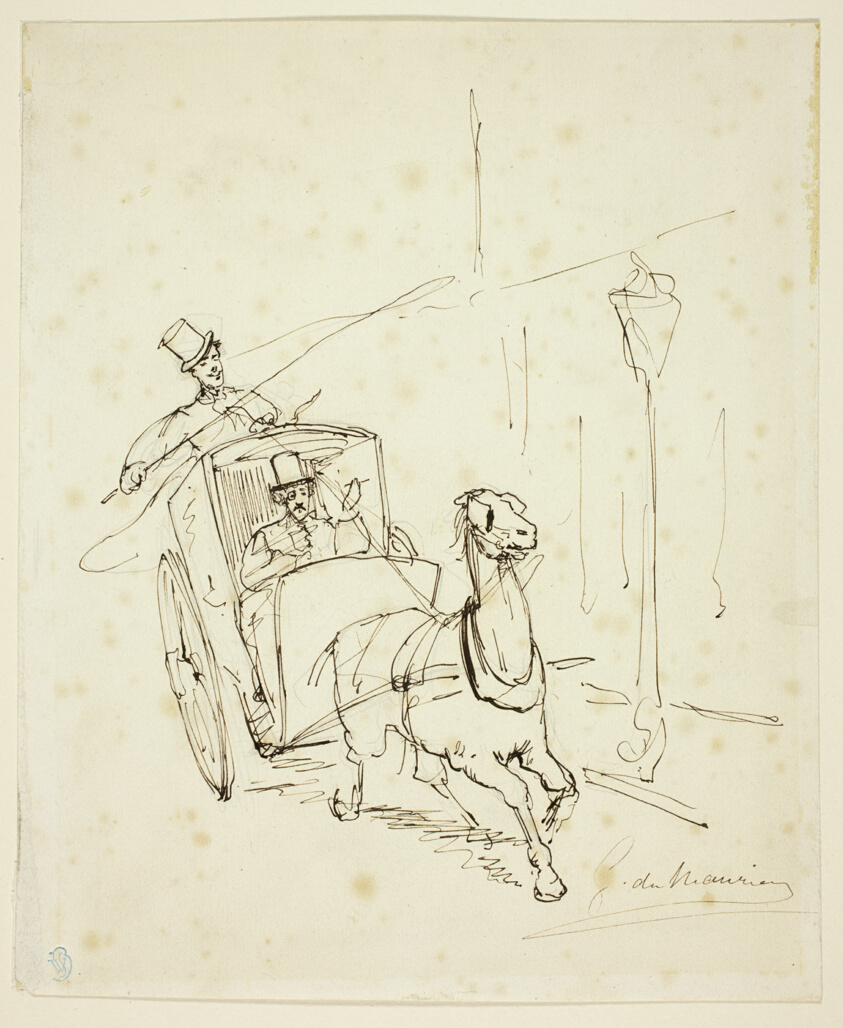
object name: Drawing and Watercolor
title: Whistler in a Hansom Cab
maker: George Louis Pamella Busson Dumaurier; French, 1834-1896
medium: Pen and ink on paper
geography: France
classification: pen and ink drawings; drawings (visual works); prints and drawing